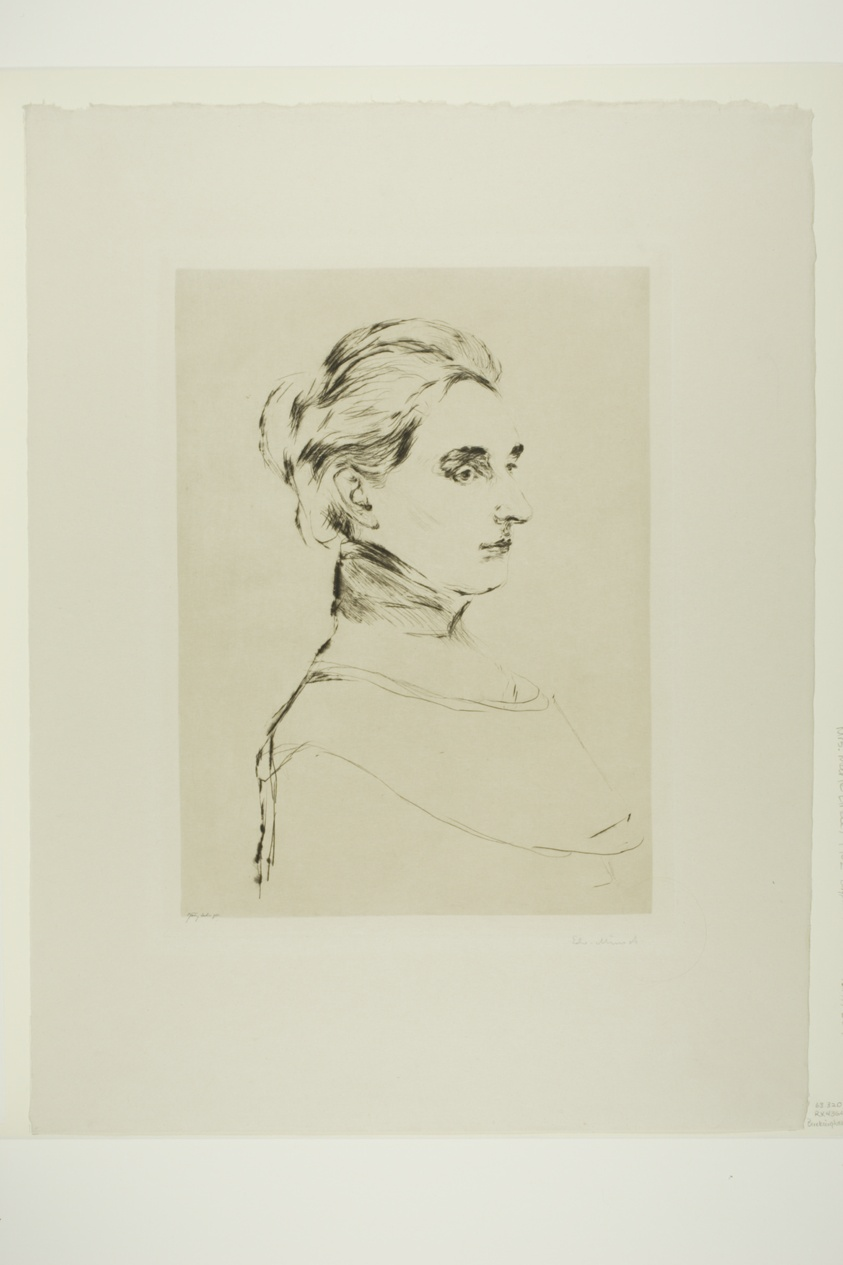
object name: Print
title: Mrs. Marie Linde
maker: Edvard Munch (Norwegian, 1863-1944); printed by Otto Felsing (German, born 1854)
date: 1902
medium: Drypoint on buff wove paper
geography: Norway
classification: drypoint; print; prints and drawing